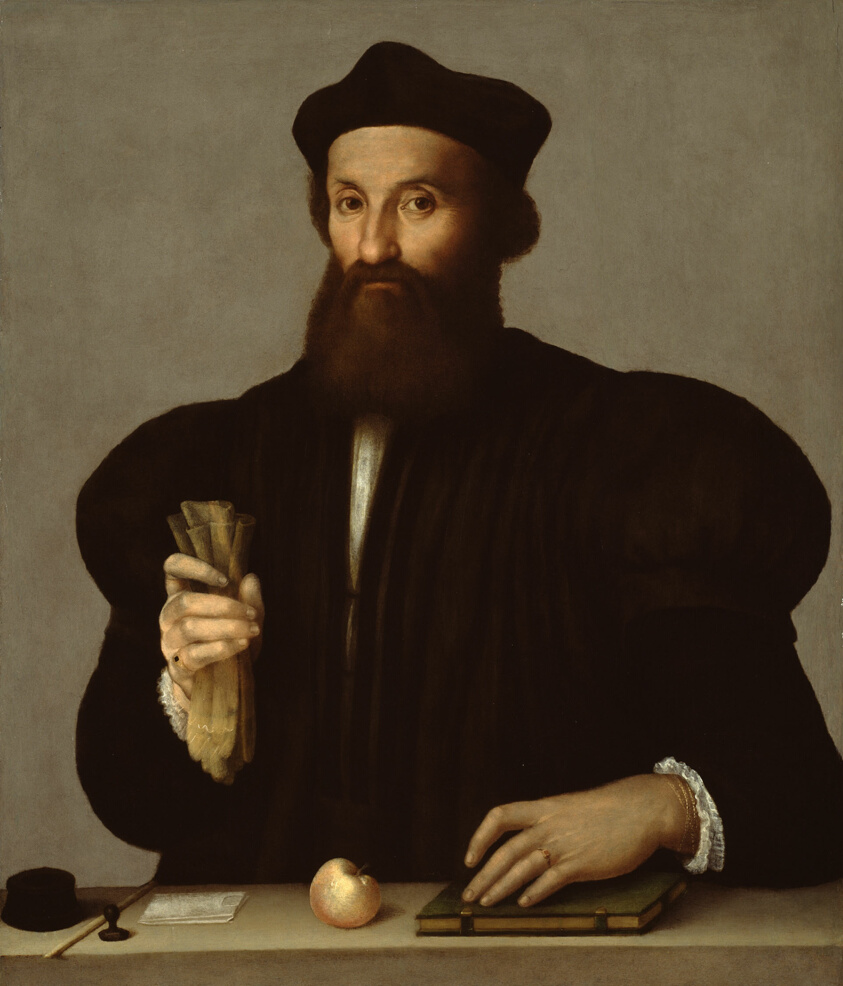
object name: Painting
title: Portrait of a Gentleman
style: sixteenth century, 16th Century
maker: Venetian or Lombard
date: c. 1540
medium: Oil on panel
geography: Italy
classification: oil on panel; Italian; oil paintings (visual works); paint; portrait; painting; european painting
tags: portraits: male subject, bearded man, jewelry, book, fruit, apples, black (color), portrait, portraits, Century of Progress, world's fairs, Chicago World's Fairs